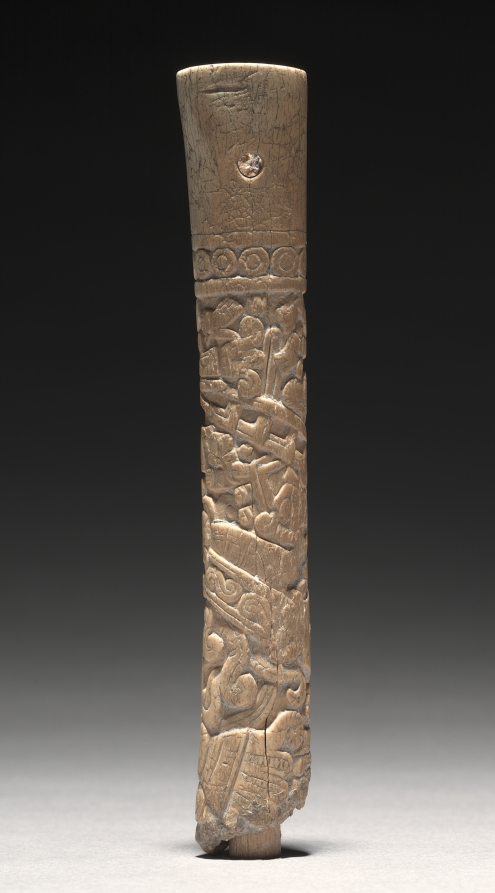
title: Carved Tube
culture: Mexico, Oaxaca, Mixtec, 13th-16th century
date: c. 1200–1519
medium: bone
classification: Jewelry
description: Carved in spiral registers, the ornamentation on this bone tube resembles Mixtec painting, both in codices (screenfold books) and architectural murals.